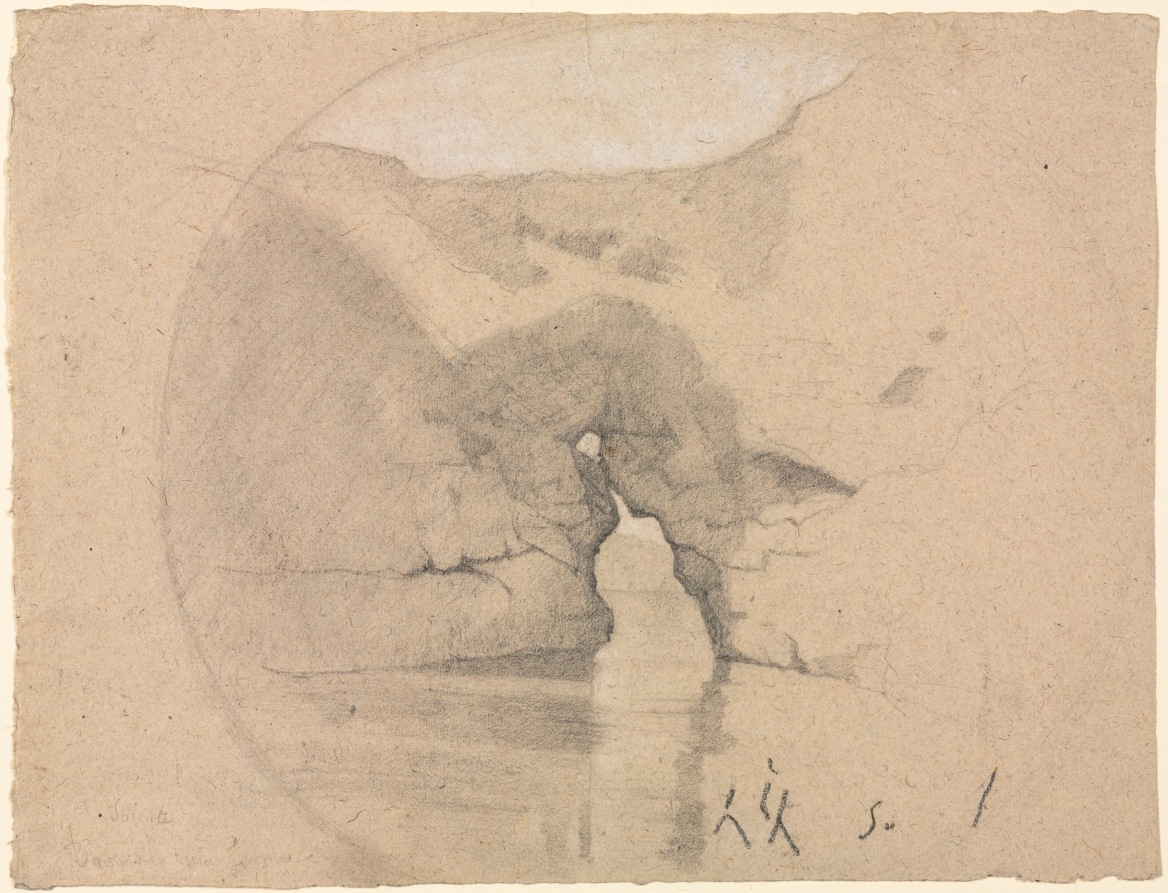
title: Sorrente, Bains de la Reine Jeanne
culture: France, 19th century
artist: Henri Joseph Harpignies (French, 1819–1916)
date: 1848–1865?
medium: black and white chalk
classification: Drawing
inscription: $675